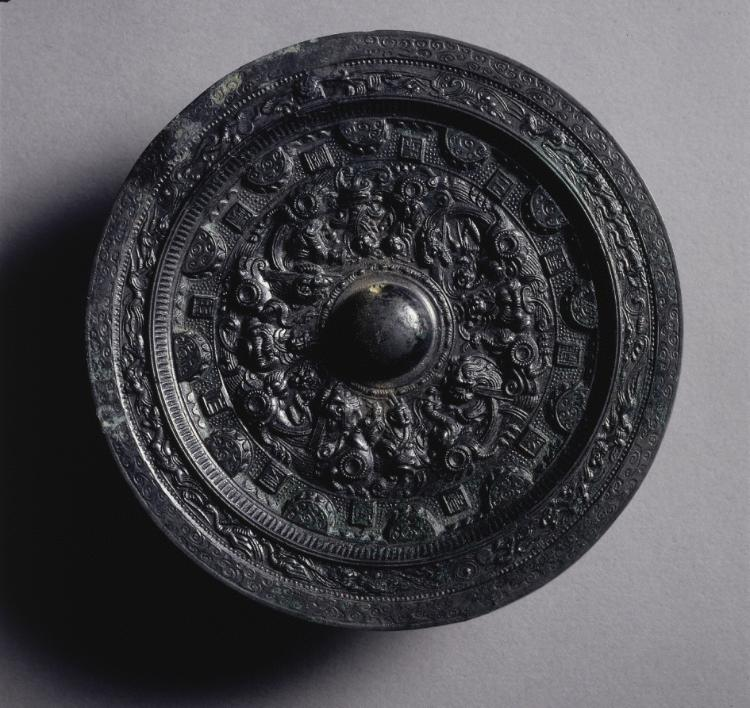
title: Mirror with Deities and Animals Surrounded by Rings of Squares and Semicircles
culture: China, Eastern Han dynasty (25–220 CE)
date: 175–225 CE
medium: bronze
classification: Metalwork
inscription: 吾作明鏡，幽凍三商。 雕刻極無（無極）。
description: Inscription: I made this bright mirror by refining the three metals. Then I sculpted infinite forms.